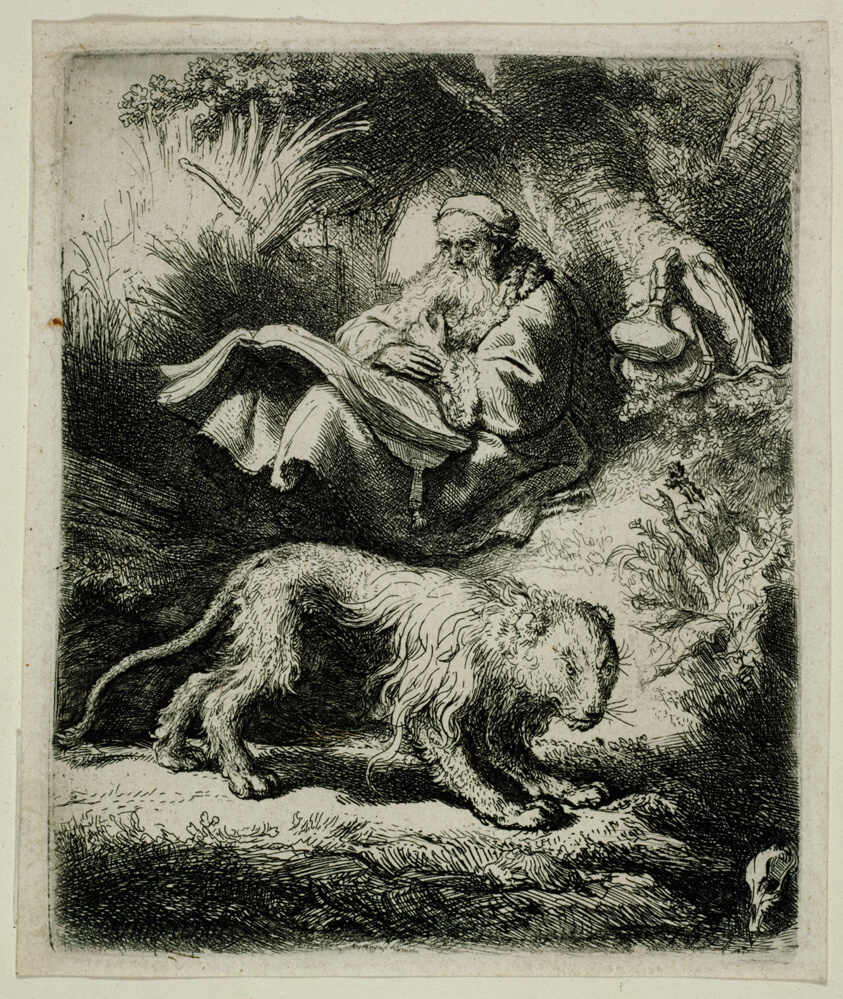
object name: Print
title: St. Jerome Reading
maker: Rembrandt van Rijn (Dutch, 1606-1669)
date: 1634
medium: Etching on ivory laid paper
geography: Holland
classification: etching; print; prints and drawing; paper